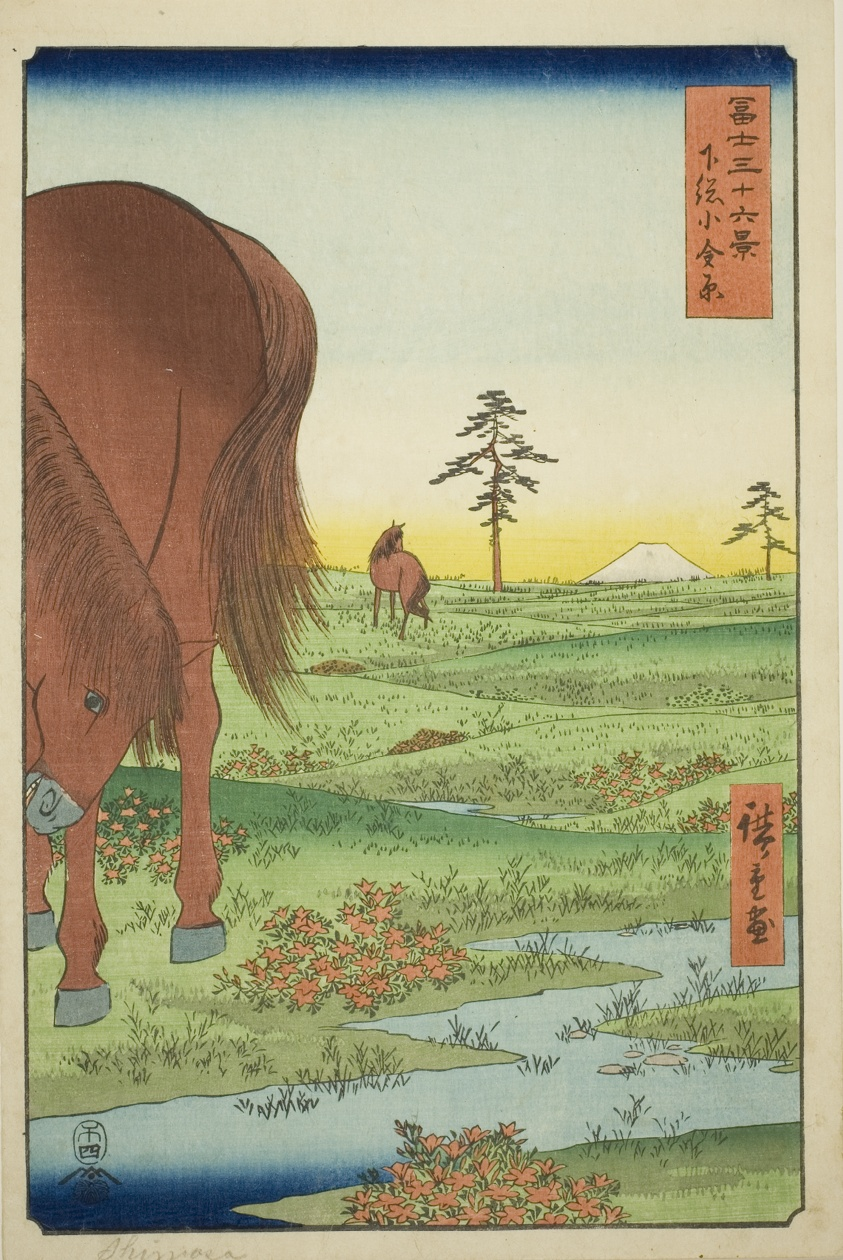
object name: Print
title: Kogane Plain in Shimosa Province (Shimosa Koganehara), from the series "Thirty-six Views of Mount Fuji (Fuji sanjurokkei)"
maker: Utagawa Hiroshige 歌川 広重; Japanese, 1797-1858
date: 1858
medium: Color woodblock print; oban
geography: Japan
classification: woodblock print; print; asian art